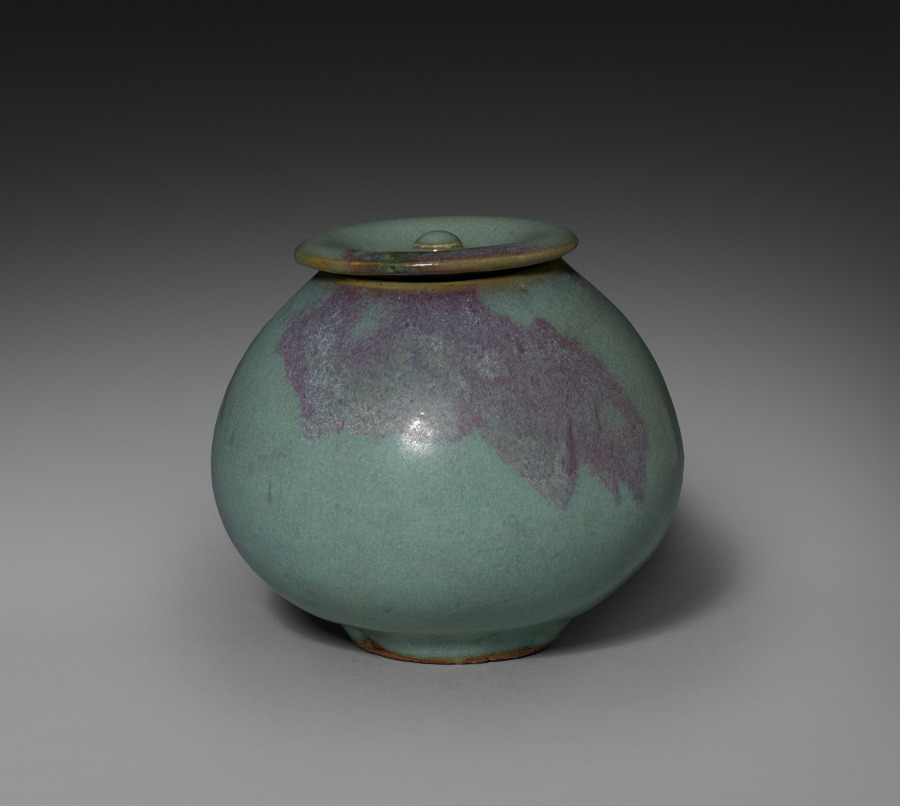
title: Jar with Cover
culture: China, Henan province, Yuxian, Northern Song dynasty (960-1127) or Jin dynasty (1115-1234)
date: 1100s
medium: porcelaneous stoneware with blue glaze and splashes of purple, Jun ware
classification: Ceramic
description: The beauty of Jun ware lies in its spectacular glaze effects, which provide immediate visual appeal. The glaze that is thickly applied onto the heavily potted body also lends the vessel a sense of volume. As shown here, its glaze colors range from soft milky-blue to rose-purple. The purple suffusions are created by splashing or brushing copper-rich pigments onto the glaze before firing. The merging of purple splashes with opalescent blue glaze displays rich tonal variations, resembling purplish glows at sunset.